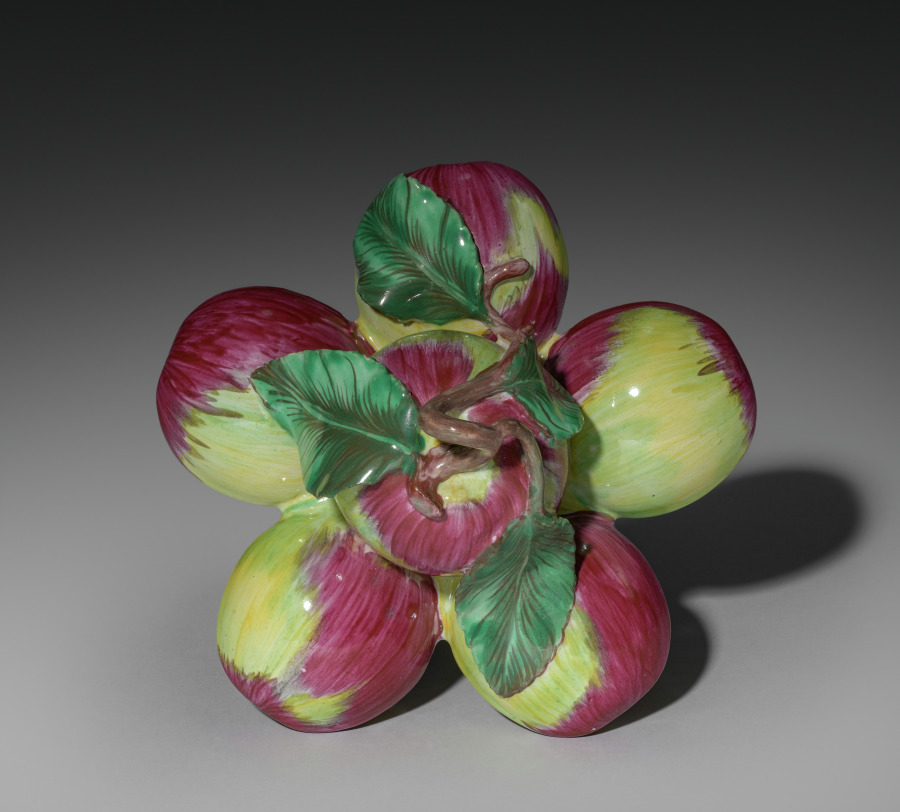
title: Cover for a Box in the Form of Apples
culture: France, 18th century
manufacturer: Sceaux Factory (French, active 1748–66)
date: c. 1760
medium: Tin- glazed earthenware (faience) wth enamel decoration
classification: Ceramic